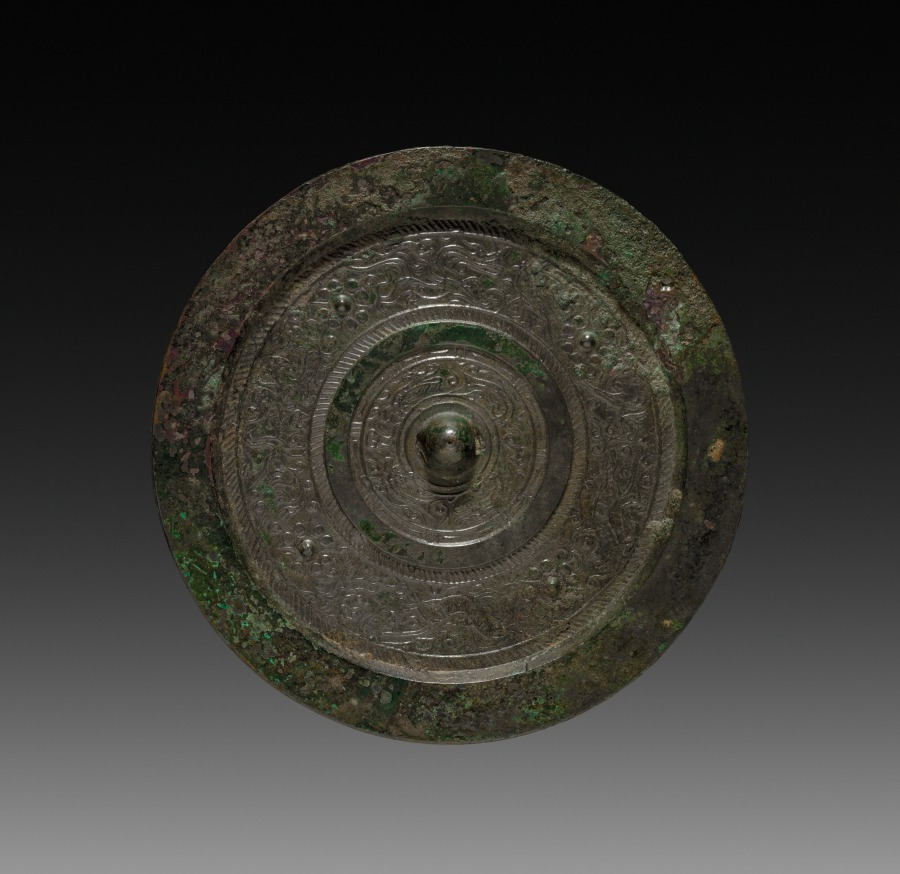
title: Mirror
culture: China, Han dynasty (202 BCE–220 CE)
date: 206 BCE–220 CE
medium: bronze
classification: Metalwork